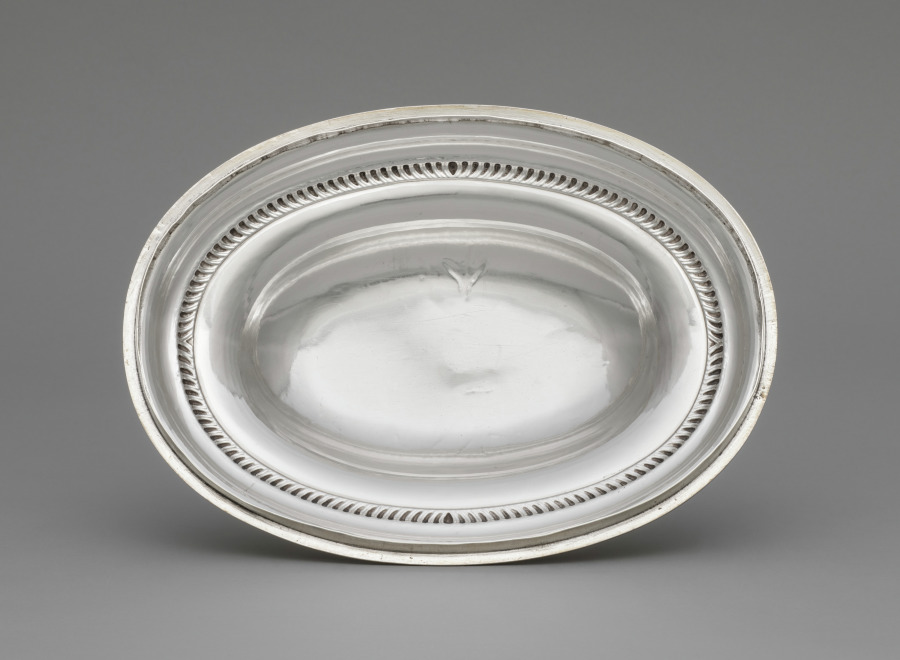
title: Cover for a Tureen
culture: England, 18th century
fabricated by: Edward Wakelin (British, 1784)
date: 1753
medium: silver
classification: Silver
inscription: engraved coat of arms of Admiral Edward Vernon of Nacton (1684-1757) and his wife Sarah, daughter of Thomas Best. Engraved on cover is Vernon crest, a woman holding a scythe.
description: A very successful silversmith, Edward Wakelin may have been more a businessman than a craftsman or designer.